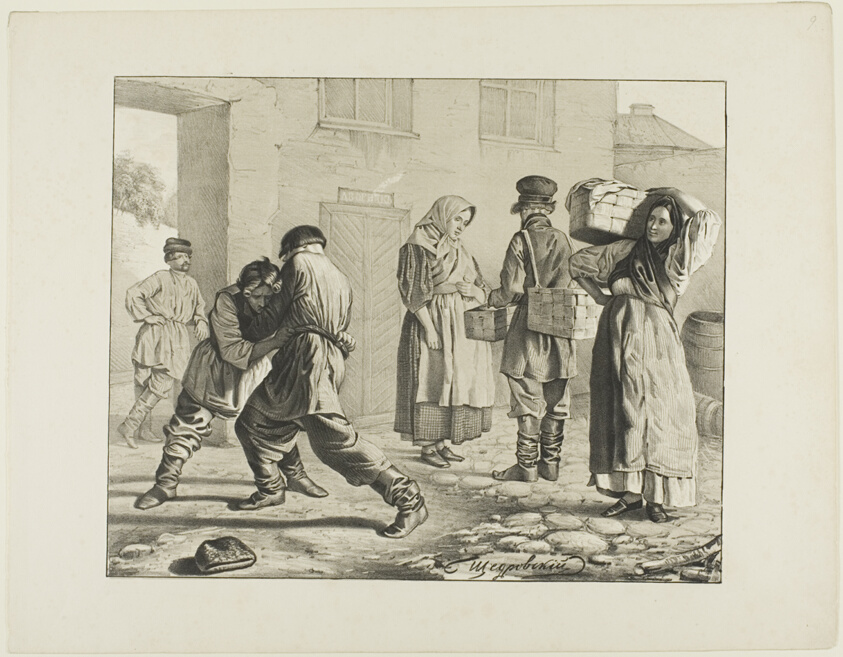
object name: Print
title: Scenes from Russian Folk Life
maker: Ignatii Stepanovich Shchedrovskii (Russian, 1815-1870)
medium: Color lithograph on paper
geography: Russia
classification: lithograph; print; prints and drawing